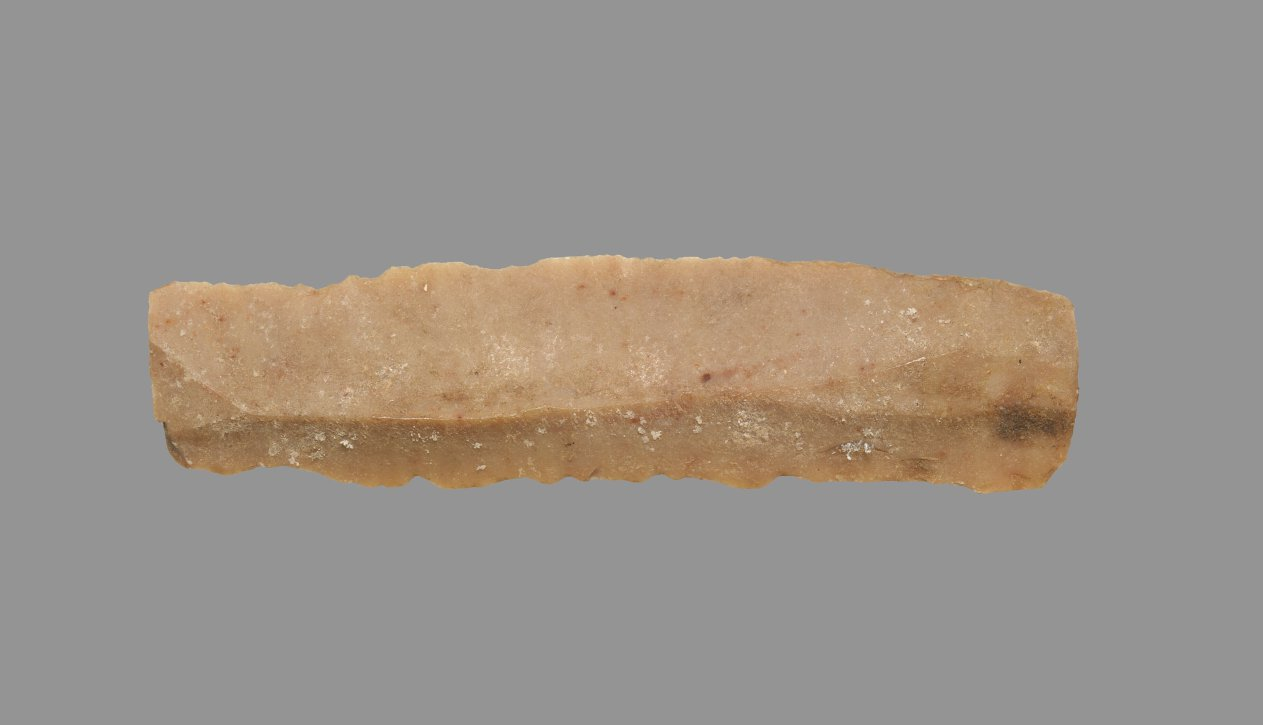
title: Sickle Blade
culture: Egypt, Middle Kingdom (2040–1648 BCE), Dynasty 12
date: 1980–1801 BCE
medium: flint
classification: Implements